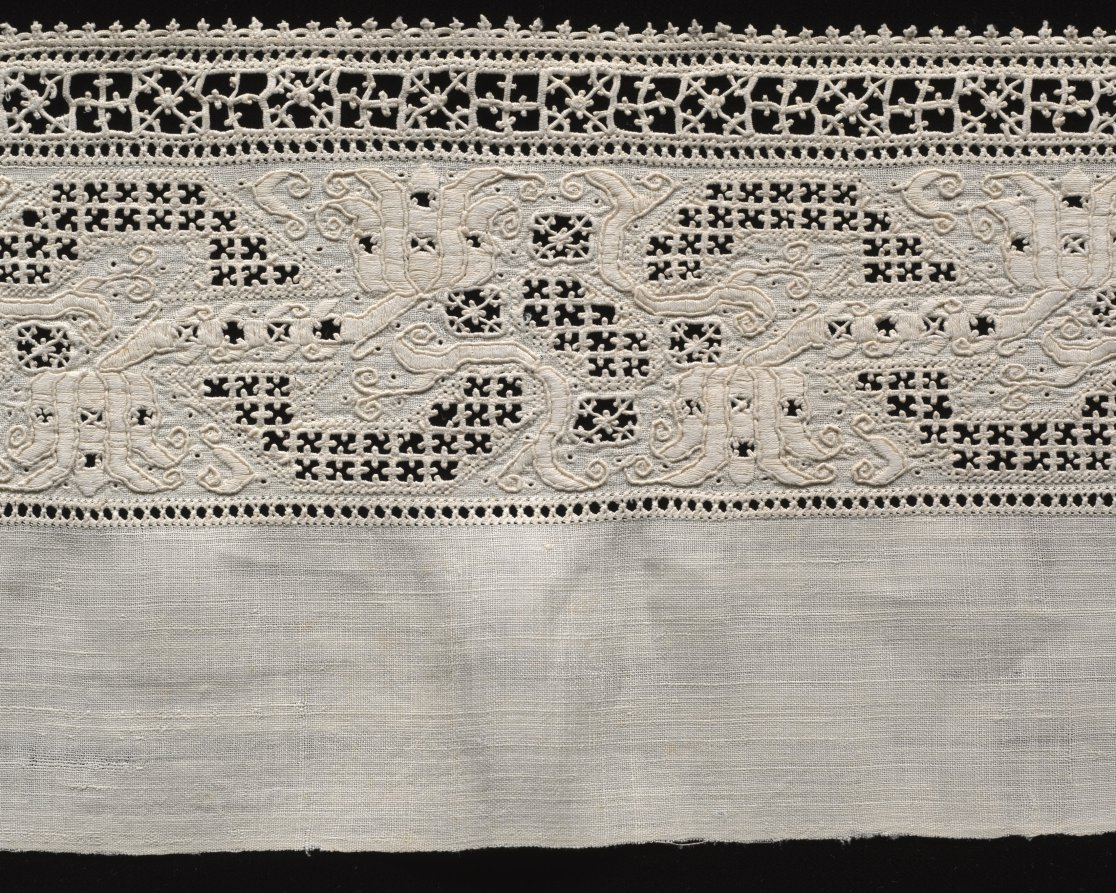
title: Lace Band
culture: Italy, 1600s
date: 1600s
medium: Linen: needle lace (cutwork and reticella) and embroidery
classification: Lace